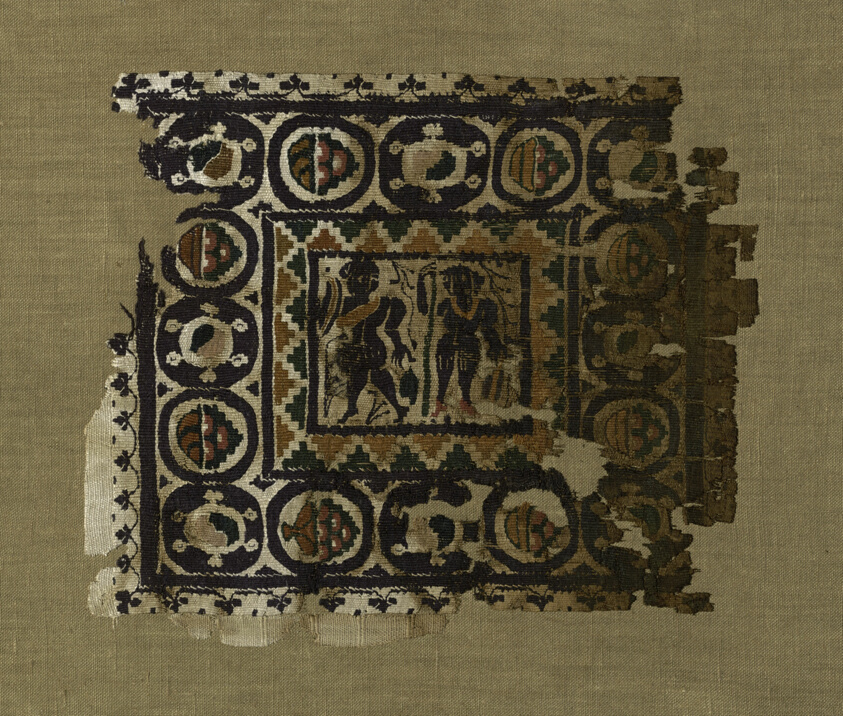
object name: Textile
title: Fragment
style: roman period (egyptian), coptic (period)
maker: Coptic (Egypt)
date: Roman period (30 B.C.– 641 A.D.), 4th/5th century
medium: Linen and wool, tapestry weave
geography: Egypt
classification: textile; weaving